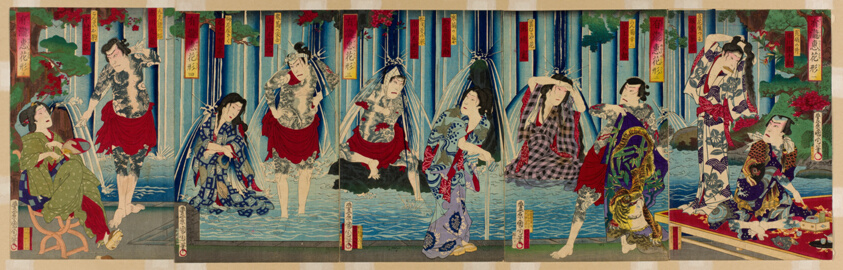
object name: Print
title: Kabuki Stars Before a Gracious Waterfall (Arigataki megumi no hanagata)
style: Japanese (culture or style)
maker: Toyohara Kunichika (Japanese, 1835-1900)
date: 1883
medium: Color woodblock print; oban pentaptych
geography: Japan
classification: woodblock print; print